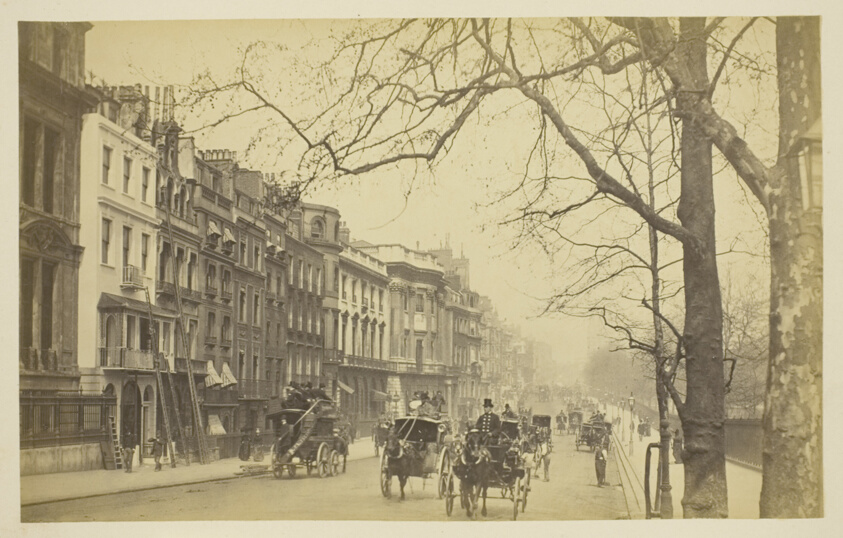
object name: Photograph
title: Piccadilly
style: 19th century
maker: Artist unknown; probably English, 19th century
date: 1850–1900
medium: Albumen print, from the album "Views of London"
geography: England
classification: albumen silver print; photographic process; photography; photograph